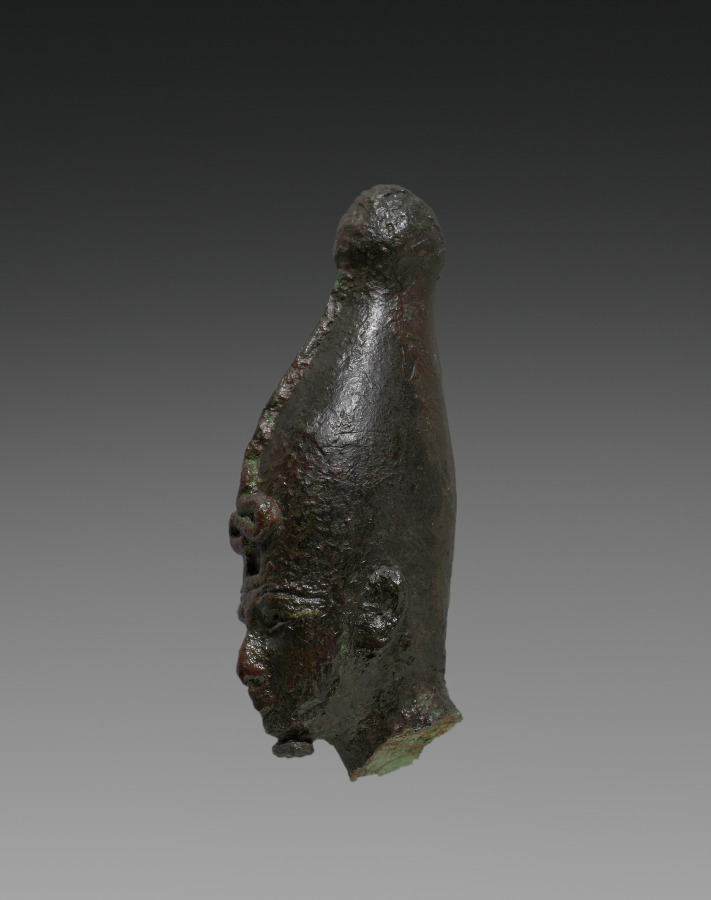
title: Statuette of Osiris (head)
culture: Egypt, Late period (715–332 BCE), Dynasty 26 or later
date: 664–525 BCE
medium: black copper (?), hollow cast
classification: Sculpture